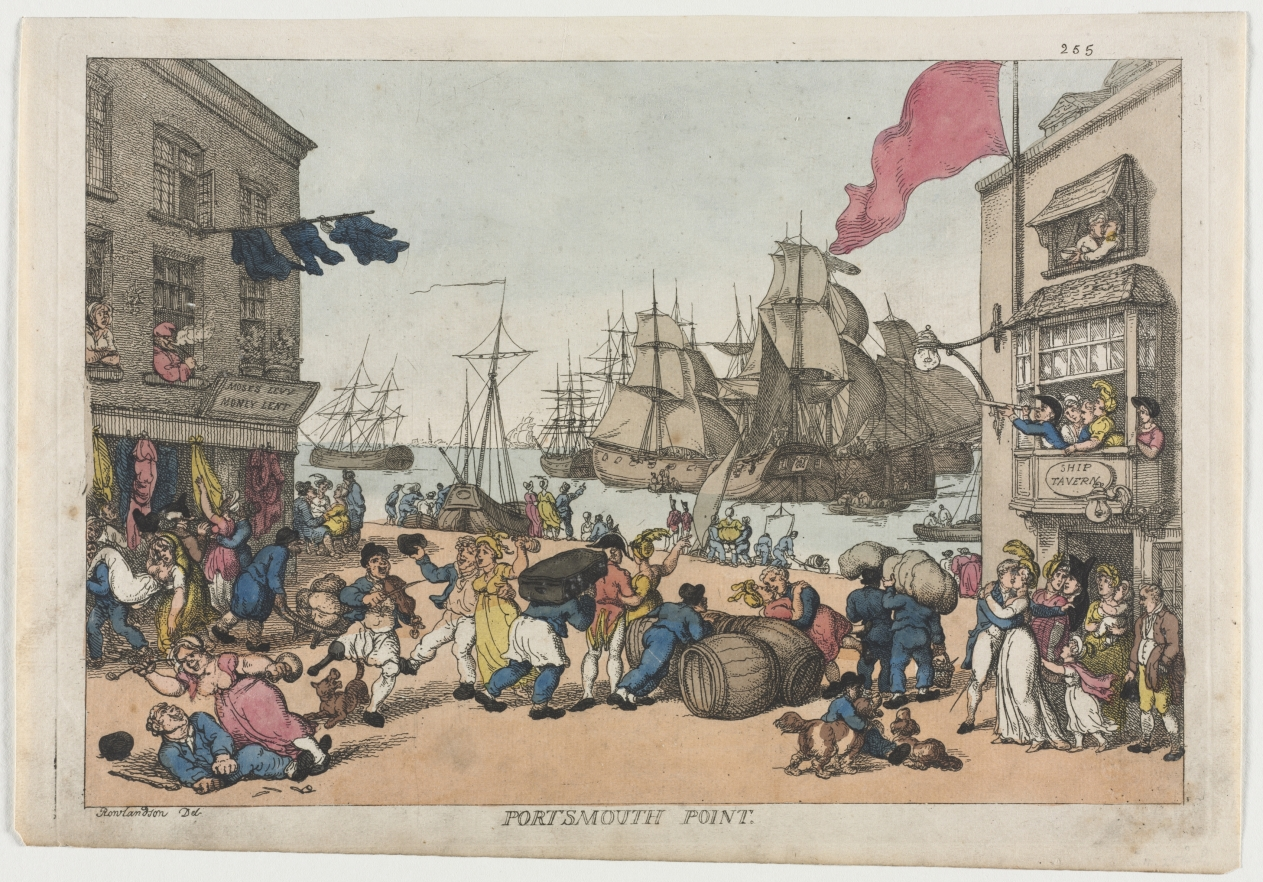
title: Portsmouth Point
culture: England, 19th century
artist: Thomas Rowlandson (British, 1756–1827)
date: 1814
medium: etching, hand colored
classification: Print